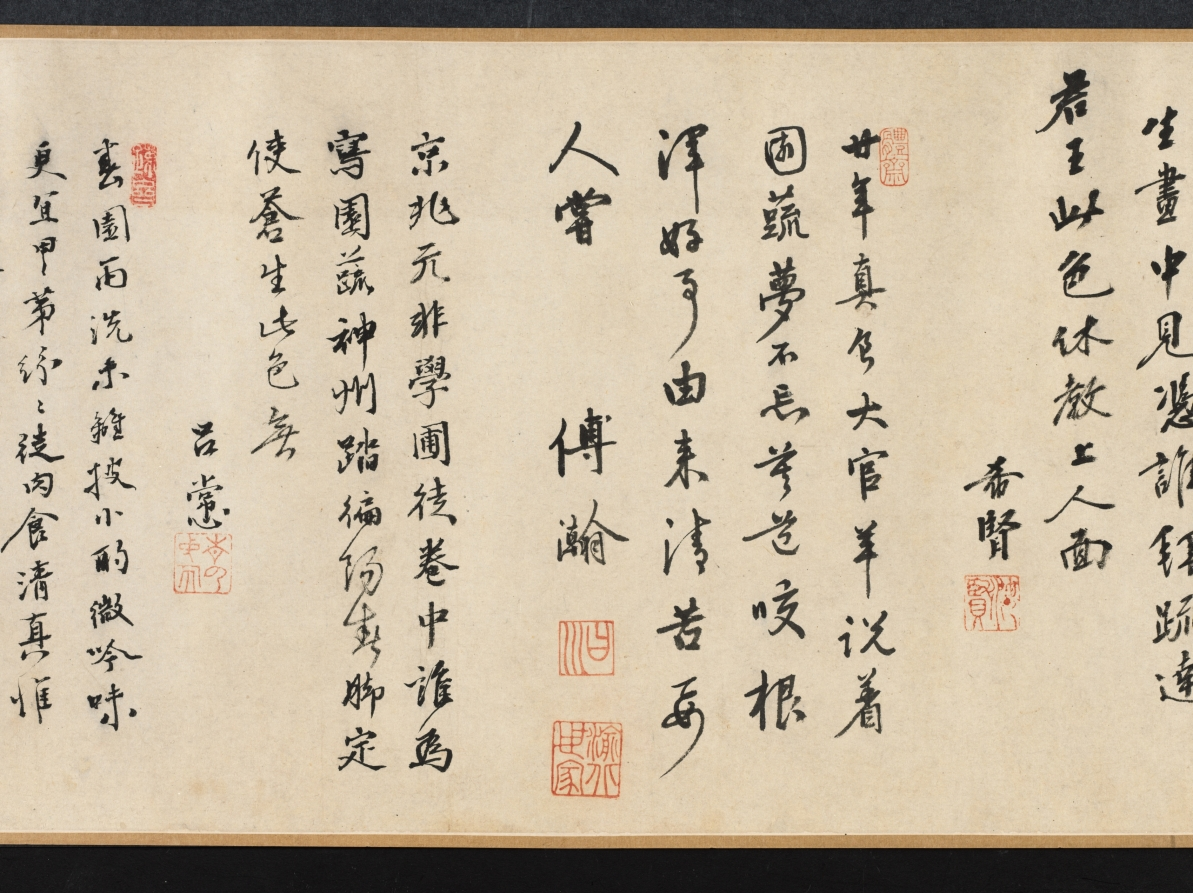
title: Chrysanthemums and Cabbage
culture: China, Ming dynasty (1368–1644)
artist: Tao Cheng (Chinese, active c. 1471–after 1502)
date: c. 1486 or before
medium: handscroll, ink and slight color on paper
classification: Painting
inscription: Artist's seal at beginning of painting: Yun hu 雲湖. Title by Wang Wenzhi 王文治 (1730–1802), date 1756. 2 seals of Wang Wenzhi 王文治 (1730-1802); 3 seals of Ku Yün (n. d.)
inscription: Section A (Chrysanthemums): 1 poem and 1 seal of Zhang Yuanzhen 張元禎 (1437–1507) - Jinshi, 1461; 1 poems and 3 seals of Ni Yue 倪岳 (1444–1501) - Jinshi, 1464; 1 poems and 2 seals of Zhao Xiang 趙祥 (life dates unknown) - Jinshi, 1469; 1 poems and 1 seals of Wu Xixian 吳希賢 (1437–1489) - Jinshi, 1464; 1 poems and 1 seals of Lü Chang 呂㦂 (1449–1511) - Juren, 1471; 1 poems and 3 seals of Fu Han 傅瀚 (1435–1502) - Jinshi, 1464; 1 poems and 1 seals of Feng Jue 馮珏 (life dates unknown) - Jinshi, 1478.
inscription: Chrysanthemums section, poem 1, by Zhang Yuanzhen 張元禎 (1437–1507): Several bushes of chrysanthemums grow in front of the Five-Willow Cottage,/ The yellow ones are really yellow and the white ones white./ This affable and decent fellow, young in years and unsophisticated,/ Has snapped one of the branches to dip in ink. (The Five-Willows Cottage was the home of the poet Tao Qian 陶潛 (Tao Yuanming 陶淵明, AD 365-427).) Chrysanthemums section, poem 2, by Ni Yue 倪岳 (1444–1501): Where at the Eastern Fence can you grieve for the Soul of the Xiang River?/ A man of upright character is mourned within the traces of ink./ White jade with a slight flaw would be a grievance forever,/ Later men should understand why even the roots of the flowers are washed. (Eastern Fence refers again to the poet Tao Qian 陶潛, while the Soul of the Hsiang River refers to the poet Qu Yuan 屈原 (c. 340–278 BC).) Chrysanthemums section, poem 3, by Zhao Xiang 趙祥 (life dates unknown): A clump of chrysanthemum grows in front of the bamboo pavilion,/ The winds of many autumns have blown since we parted beyond the river./ Straining wine through the official's cap of Tao [Qian] to prolong autumn's pleasures,/ The mists and clouds of ten thousand miles belong to the intoxicated. Chrysanthemums section, poem 4, by Wu Xixian 吳希賢 (1437–1489): It is a different spring if mulberry is planted during the latter part of the year,/ The dust of the world originally did not drop on clothing./ Who spills out ink under the Eastern Fence/ And paints so freely this portrait of chrysanthemums for the venerable Sir Tao? Chrysanthemums section, poem 5, by Lü Chang 呂㦂 (1449–1511): This full tray of ink for painting [flowers] at the Eastern Fence;/ Their whiteness or yellowness is not essential in capturing their beauty./ I don't have to go to Jiangnan to see them myself./ At my old house grow two or three branches. Chrysanthemums section, poem 6, by Fu Han 傅瀚 (1435–1502): Who daubed autumn flowers with ink/ As if they were dark dew on a branch tip only vaguely seen at evening?/ After the lazy clouds disperse, no one paints;/ A certain unconventionality pervades this painting. Chrysanthemums section, poem 7, by Feng Jue 馮珏 (life dates unknown): To satisfy his hunger, [the chrysanthemums] have at times entered the poetry of Qu Yuan;/ Taking up the wine cup, it felt close to Tao Qian./ [With them I am like] a lonely root sustained by deep water/ Or an old man to whose hair the color of youth returns.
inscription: Section B (Cabbage): 1 poem and 1 seal of Cai Qi 蔡圻 (life dates unknown) - degree information not known; 1 poems and 3 seals of Ni Yue 倪岳 (1444–1501) - Jinshi, 1464; 1 poem and 3 seals of Jiao Fang 焦芳 (1436–1517) - Jinshi, 1464; 1 poem and 3 seals of Li Dongyang 李東陽 (1447–1516) - Jinshi, 1464; 1 poems and 1 seals of Wu Xixian, signed “Xixian” 吳希賢 - Jinshi, 1464; 1 poems and 3 seals of Fu Han 傅瀚 (1435–1502) - Jinshi, 1464; 1 poems and 1 seals of Lü Chang 呂㦂 (1449–1511) - Juren, 1471; 1 poems and 2 seals of Zhao Xiang 趙祥 (life dates unknown) - Jinshi, 1469; 1 poems and 1 seals of Feng Jue 馮珏 (life dates unknown) - Jinshi, 1478.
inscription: Cabbage section, poem 1, by Cai Qi 蔡圻 (life dates unknown): The ink splashes are fresh from a frosty brush dipped in pond water;/ I can visualize that time when Yunhu 雲湖 [Tao Cheng] first showed his talents./ I lament the places where I scribbled before,/ Who would open them to inscribe a poem? (The first line is an allusion to the famous Jin dynasty calligrapher Wang Xizhi 王羲之 (AD 303-361), who practiced calligraphy so diligently at the edge of a pond that the water turned black with ink.) Cabbage section, poem 2, by Ni Yue 倪岳 (1444–1501): After rain the vegetables begin to grow;/ How are the colors of the masses lately!/ Once you get used to them, the tastiest parts are the ends of the roots;/ I don't know if they can be used for "seasoning soup." ("Seasoning soup" is an allusion to the statesmanship of a chief minister.) Cabbage section, poem 3, by Jiao Fang 焦芳 (1436–1517): This crop of purple stalks and green leaves is late and irregular;/ Now the rainy season is over for the Eastern Garden./ All the nobles nowadays dine on meat;/ Who of them knows the flavor of this [cabbage]. Cabbage section, poem 4, by Li Dongyang 李東陽 (1447–1516): It's always helped the honest man to sober up after drinks./ I intend to go to the deepest part of the stream-crossed garden/ To refresh myself in the fragrance and dew of evening. Cabbage section, poem 5, by Wu Xixian 吳希賢 (1437–1489): After rain, the white silk is filled with fragrant vegetables;/ How many times this happens in Mr. Tao's paintings./ On whom will you depend to present a memorial to the ruler?/ Don't let this color emerge on the faces of the people. (The last line is meant as a warning to officials: the color of the vegetables (green) may be pleasing in itself, but when it emerges on the faces of the starving poor, it signifies a badly governed world.) Cabbage section, poem 6, by Fu Han 傅瀚 (1435–1502): For twenty years I have feasted on the excellent mutton of an official;/ Yet I talk and dream about the garden and its vegetables./ Do not merely say it is good to chew the root of the cabbage--/ You must taste to understand what poverty is. Cabbage section, poem 7, by Lu Chang 呂㦂 (1449–1511): The capital is never a place for an apprentice in the "garden of scholarship."/ Who would write about gardens and vegetables on an examination paper?/ I've walked throughout the country in spring;/ Make sure the people don't show this color. Cabbage section, poem 8, by Zhao Xiang 趙祥 (life dates unknown): After a wash of rain, the spring garden is still in order;/ The flavor [of the cabbage] is more suitable with a small drink and the hum of a tune./ The rich and powerful in their mansions consume dish after dish of meat;/ Vegetarian food is known only by the scholars. Cabbage section, poem 9, by Feng Jue 馮珏 (life dates unknown): A new cabbage is nourished with dew;/ It takes a long time to grow and mature./ The business of "seasoning the soup" is your responsibility;/ Better command the gardener to take care [of the cabbages]. trans. HK/LYSL/WKH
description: On an autumn day in Beijing, Tao Cheng had a gathering with a group of scholar-officials and created two paintings in a spontaneous, casual style. The first depicts chrysanthemums, slender bamboo stalks, and a rock in monochrome ink. Tao applied light colors for the second painting that depicts cabbage. Tao deliberately placed the images on the first sections of the paper so that his honorable guests could add their poetic inscriptions inspired by his imagery. In the first section to the right, all seven poetic inscriptions refer to the beloved poet and recluse Tao Qian (also called Tao Yuanming, AD 365–427) who was particularly known for his profound love for chrysanthemum flowers. Most of the inscriptions in the second section express sympathy for the poor, since cabbage is the main ingredient in their humble food. Taken together, the poems and paintings allude to the life and responsibilities of the scholar-official: the importance of both an upright character and a concern for the poor citizens in order to achieve good government.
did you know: Eminent calligrapher Wang Wenzhi 王文治 was only 27 sui when he wrote the title in 1756.